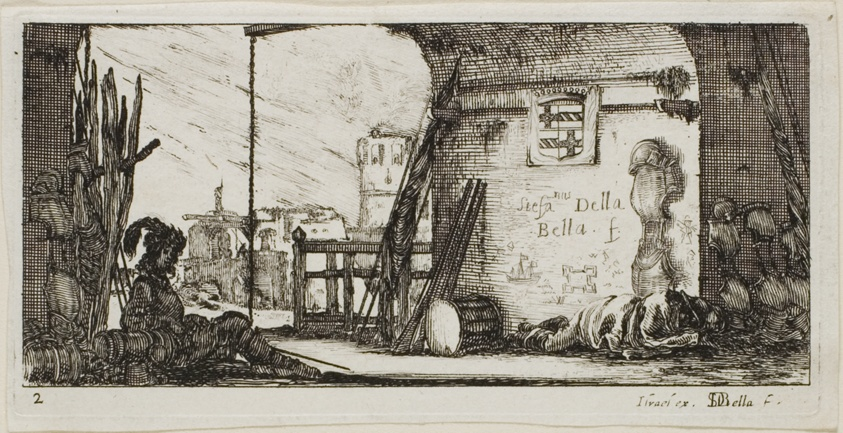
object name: Print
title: Plate Two from Drawings of Several Movements by Soldiers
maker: Stefano della Bella (Italian, 1610-1664)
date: 1644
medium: Etching on ivory laid paper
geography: Italy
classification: etching; paper; print; prints and drawing